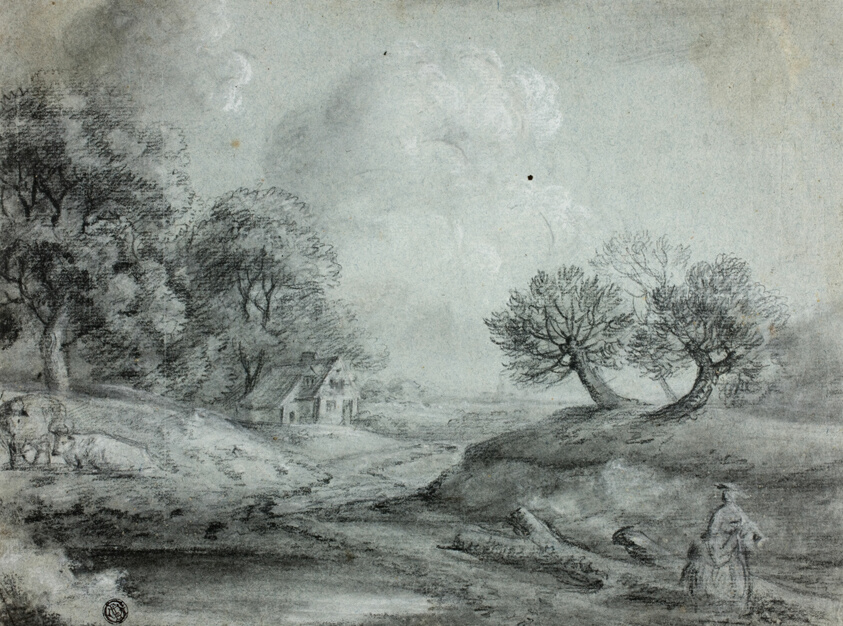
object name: Drawing and Watercolor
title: Landscape with Woman and Cows (recto); Sketch of a Landscape (verso)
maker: Richard Wilson (English, 1714-1782); or Thomas Morro (English, 1759-1833); or George Frost (English, c. 1754-1821); or the style of Thomas Gainsborough (English, 1727-1788)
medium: Black chalk with stumping, heightened with white chalk (recto), and black chalk (verso), on blue laid paper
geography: England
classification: chalk; drawings (visual works); prints and drawing